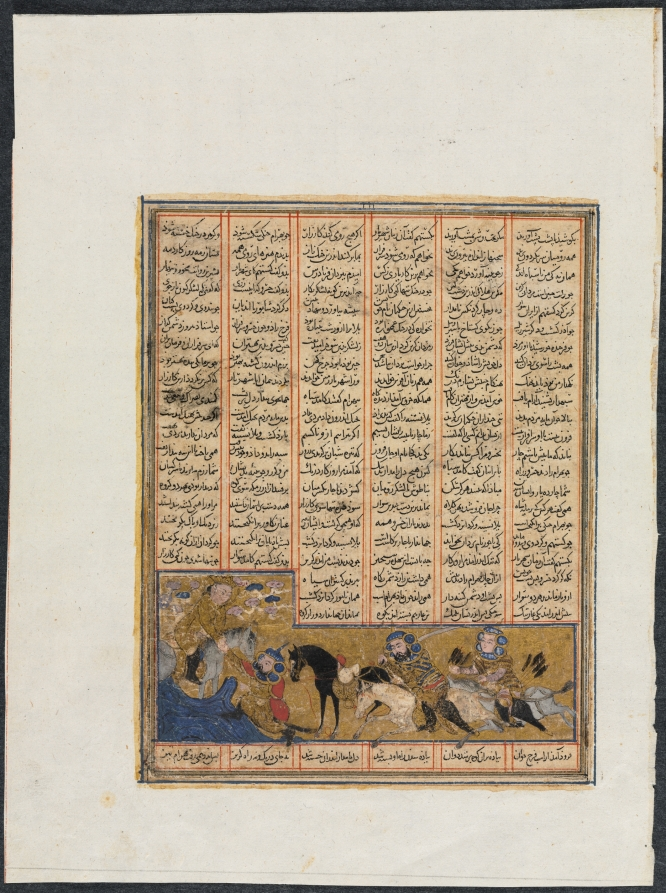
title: Khusrau Parviz Fleeing Bahram Chubineh and Being Saved by Angel Sarush (recto) from a Shahnama (Book of Kings) of Firdausi (940–1019 or 1025)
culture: Iraq, Baghdad, Ilkhanid period (1256-1353)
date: c. 1299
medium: opaque watercolor, ink, and gold on paper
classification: Manuscript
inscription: script: Naskh